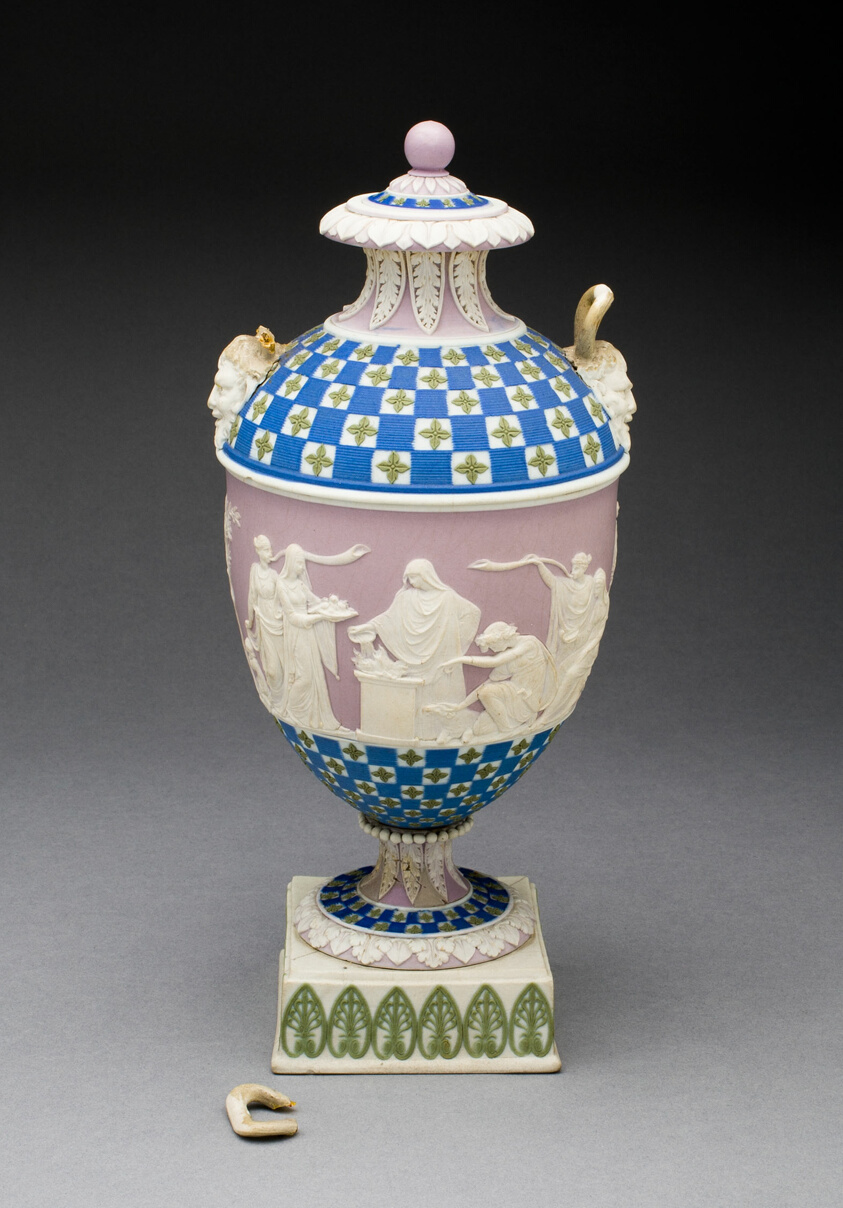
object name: Ceramics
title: Vase with Sacrifice to Hymen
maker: Wedgwood Manufactory (England, founded 1759)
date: c. 1800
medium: Stoneware (jasperware)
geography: Burslem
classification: vase; vessel; ornamental piece; stoneware; european decorative arts; ceramics